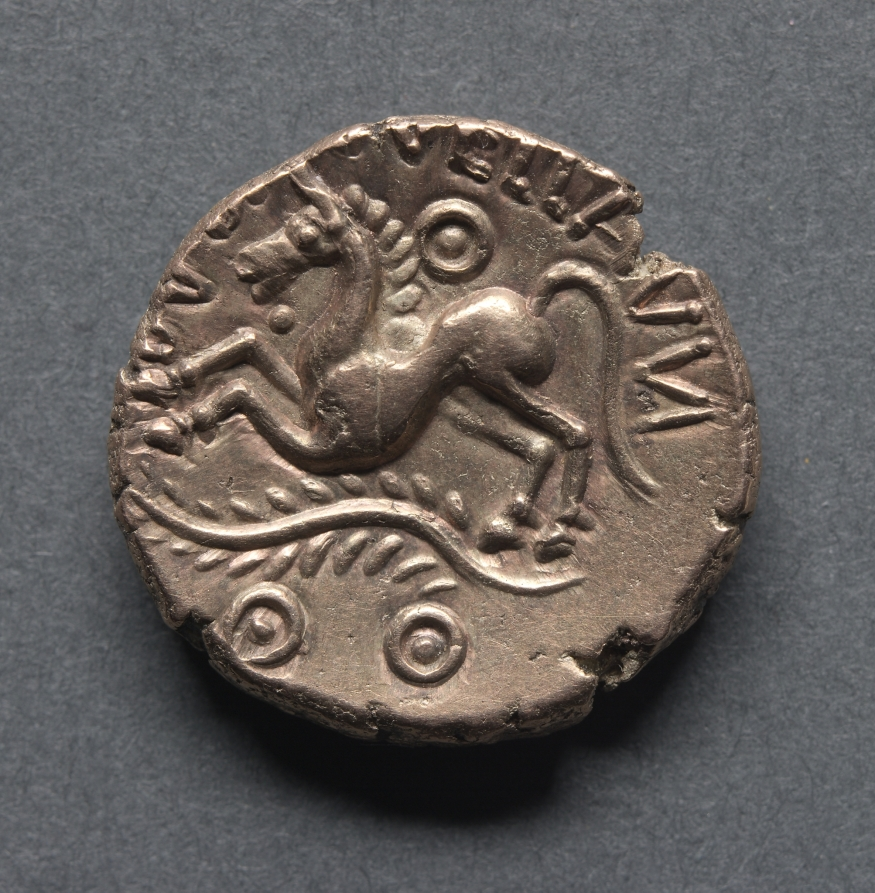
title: Dubnovellaunos Stater: Wreath and Crescents (obverse)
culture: England, Trinovantes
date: 20 BCE–10 CE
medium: gold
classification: Coins